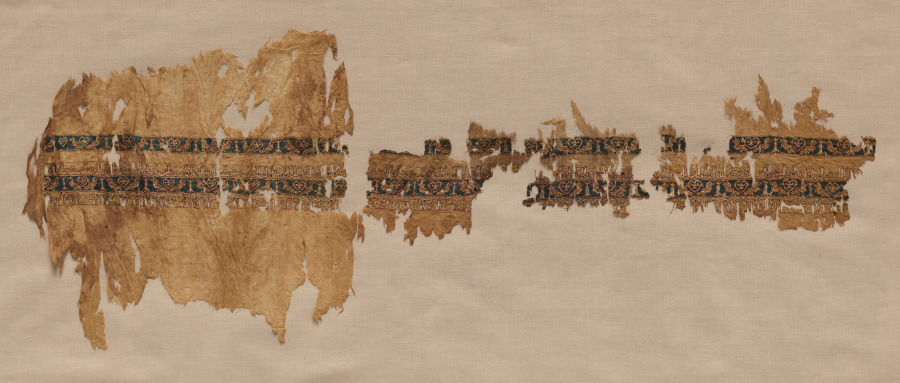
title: Tiraz with gold, probably from a wide sleeve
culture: Egypt, Fatimid period, reign of Caliph al-Hakim, 1013–20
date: 1013–1020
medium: plain weave with inwoven tapestry weave: linen, silk, and gold filé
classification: Textile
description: This textile with expensive gold foil is among the rarest surviving examples among thousands of medieval textiles with historic or generic inscriptions in Arabic, known as tiraz. Tiraz were "emblems of dignity," the prerogative of sovereigns and those they wished to honor. This inscription is masterful. The tall letters are woven with silk thread on only two warps in slit-tapestry weave while the ground was woven with pure gold foil wrapped around a silk core that was not beaten in—to show off its brilliance. The text begins with a prayer and provides the name of Imam al-Hakim, but lacks the place and date of manufacture. The decorative bands feature brilliant gold birds facing simplified trees alternating with popular palmette-decorated hearts. This tiraz fragment may have been part of a wide sleeve that functioned as a receptacle because clothing didn’t have pockets.